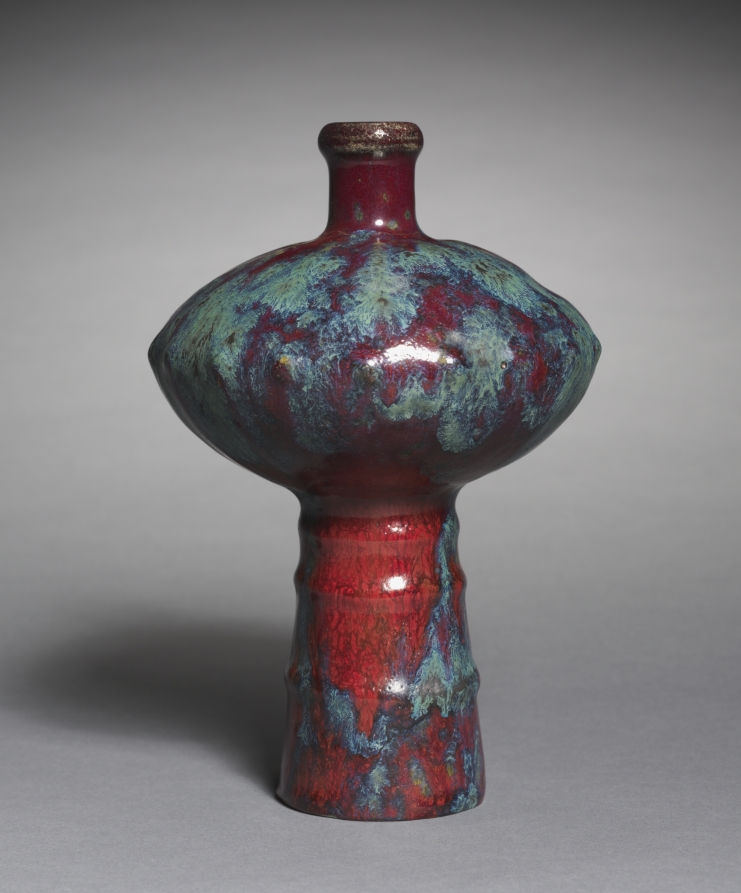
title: Vase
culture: France, late 19th-early 20th Century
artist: Pierre Adrien Dalpayrat (French, 1844–1910)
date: c. 1900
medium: stoneware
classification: Ceramic